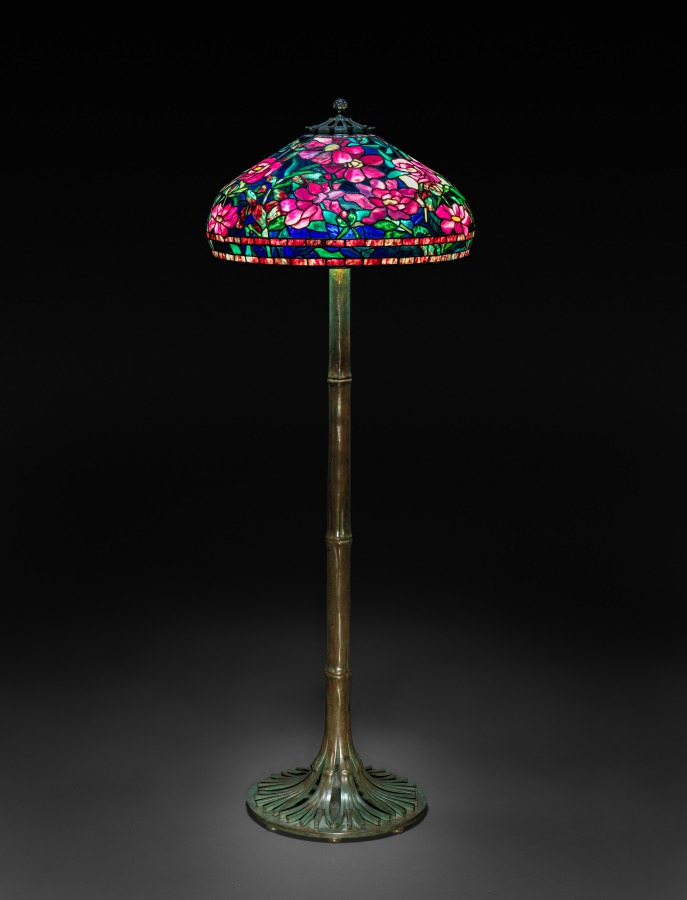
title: Peony Floor Lamp with a Bamboo Base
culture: America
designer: probably by Clara Wolcott Driscoll (American, 1861–1944)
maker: Tiffany Studios (United States, New York, 1902–32)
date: c. 1905–10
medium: Leaded glass, bronze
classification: Furniture and woodwork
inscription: TIFFANY STUDIOS NEW YORK 505-17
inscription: TIFFANY STUDIOS/NEW YORK/10933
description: Tiffany and his designers brought the garden inside with their floral lamp designs. They also re-created the ever-changing qualities of natural light using the light and dark tonal effects of the glass when illuminated with electric lamps. This night and day version of the Peony shade could be rotated during the day to increase or decrease the amount of light it cast—intense reds for a darker glow at night, lighter pinks during the day.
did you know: The shade on this floor lamp can be rotated with the touch of a finger to provide brighter or dimmer light.